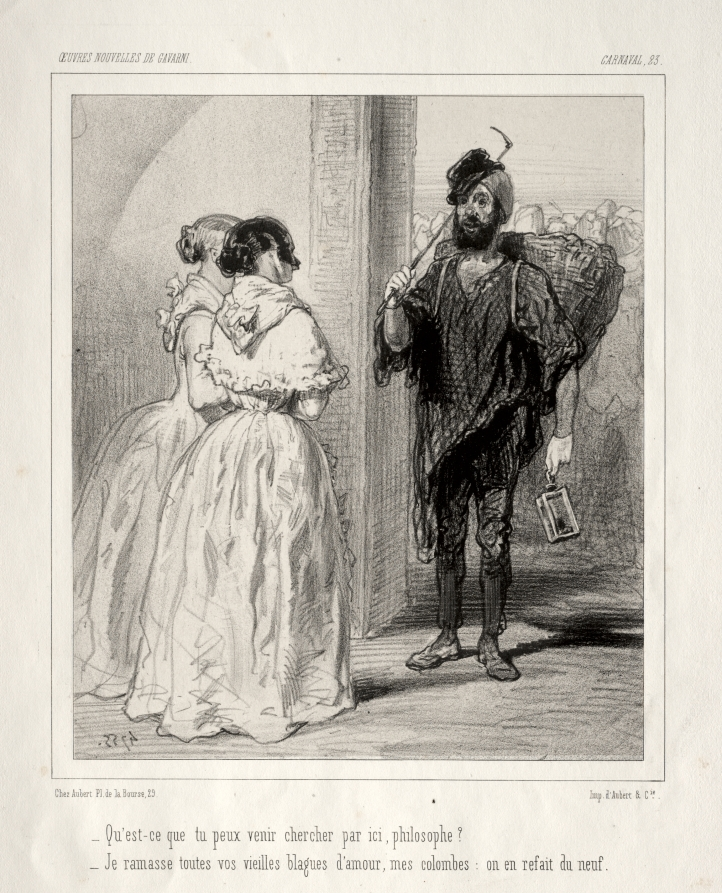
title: Carnaval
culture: France, 19th century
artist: Paul Gavarni (French, 1804–1866)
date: c. 1841–47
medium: lithograph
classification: Print